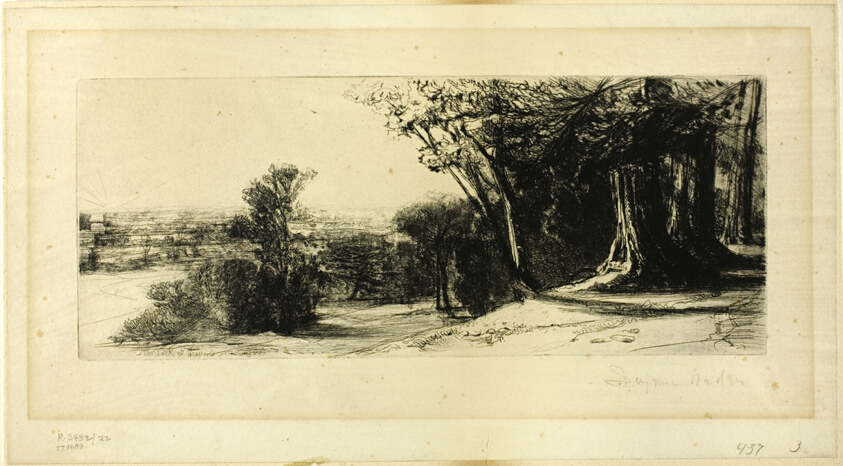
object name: Print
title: Early Morning, Richmond Park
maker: Francis Seymour Haden (English, 1818-1910)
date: 1859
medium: Etching and drypoint on ivory laid paper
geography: England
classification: etching; print; prints and drawing